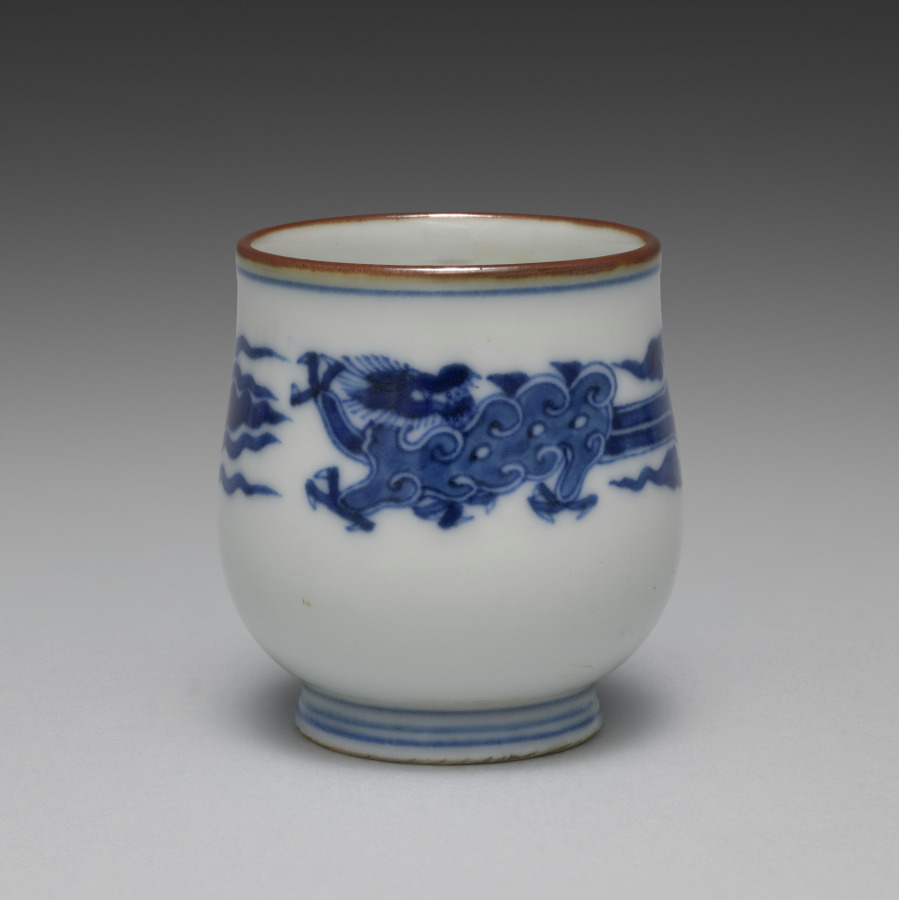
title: Cup from Sake Cups with Dragons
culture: Japan, Meiji period (1868–1912)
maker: Seifū Yohei III (Japanese, 1851–1914)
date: c. 1893–1914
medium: One from a set of six sake cups; porcelain with underglaze blue and iron oxide rims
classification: Ceramic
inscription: 大日本清風造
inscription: 清風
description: Each of these sake cups pictures two backward-looking dragons. The highly stylized creatures resemble jade carvings.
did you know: Seifū Yohei III was inspired by the Chinese mythical animals that were common on porcelain objects made at Jingdezhen in China during the Ming dynasty (1368–1644) and then exported around the world.